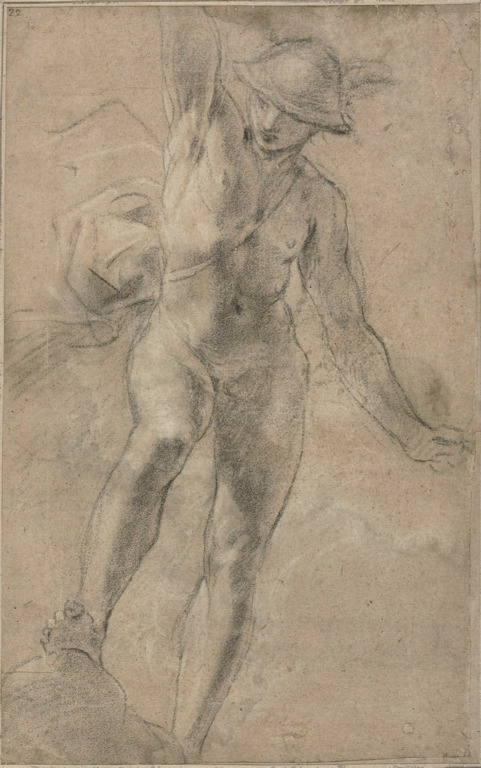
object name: Drawing and Watercolor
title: Study for Mercury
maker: Giacomo Cavedone (Italian, 1577-1660)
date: 1613/14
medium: Black chalk, heightened with white chalk, on tan laid paper, laid down on brownish-gray laid paper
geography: Italy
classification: chalk; drawings (visual works); prints and drawing